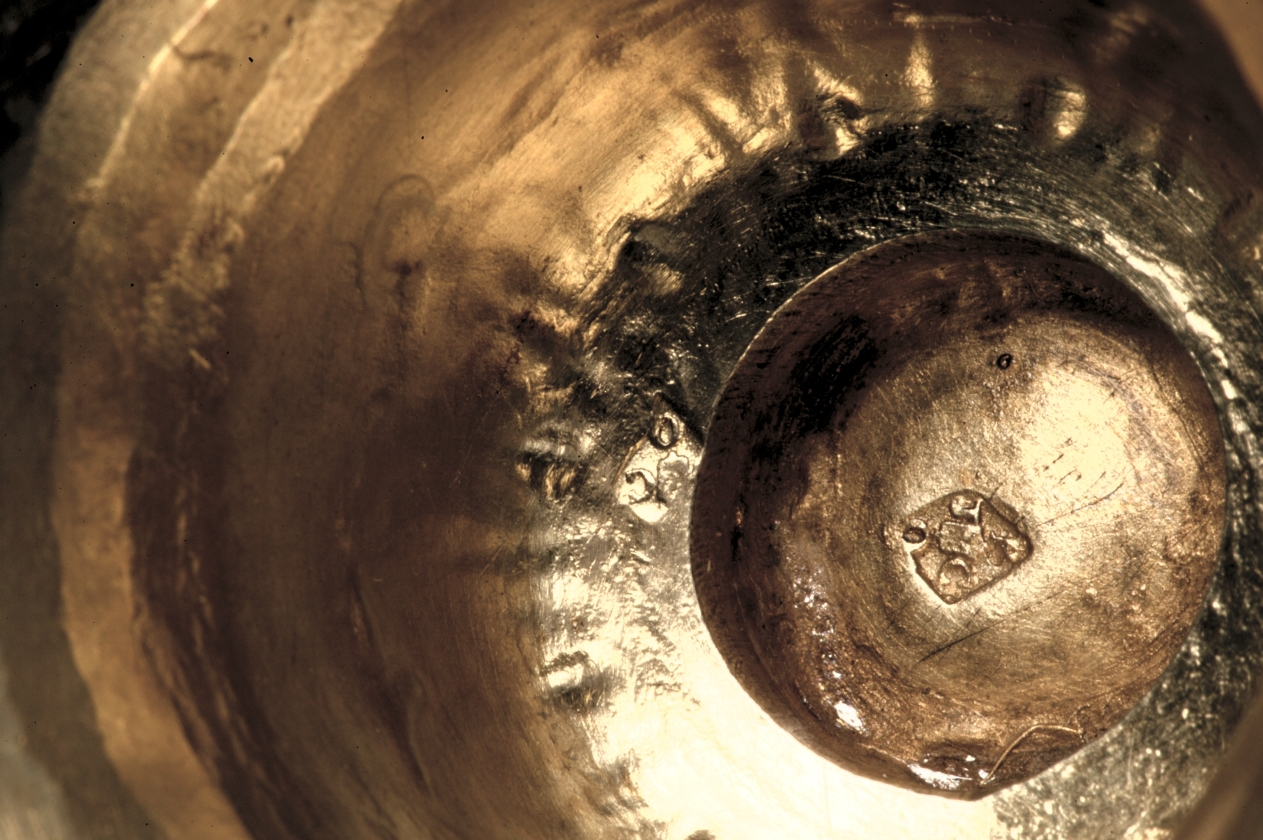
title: Ewer (aiguière)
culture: France, 19th century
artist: Jean Baptiste Claude Odiot (French)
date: c. 1817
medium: silver gilt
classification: Silver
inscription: [Excise mark for medium-sized work, Paris, 1809-1819, on edge of base]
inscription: [Two maker's marks of Jean-Baptiste-Claude Odiot after the Revolution, inside foot]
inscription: [Official assay mark for first standard silver, Paris, 1809-1819, near exterior upper rim]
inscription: [Applied coat of arms of the count Alfred de la Chapelle, Seigneur of Morton and Beaulieu, Périgord “accolé” with an alternate version of de la Chapelle, exterior of foot]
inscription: [Struck twice, interior foot]: "ODIOT"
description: Jean-Baptiste-Claude Odiot’s reputation stretched internationally. Commissioned by Russian count Nikolei Demidoff, this ewer was one part of an extensive silver dinner service. Decorated with motifs of classical antiquity, this object’s Greco-Roman silhouette, grape vine frieze, raised mythological figures, and sinuous swan’s neck handle were likely inspired by the designs of Charles Percier and Pierre-François Fontaine, architects of Napoleon I.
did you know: The coat of arms on the foot of this ewer belongs to the count Alfred de la Chapelle who owned this silver dinner service during the second half of the 19th century.